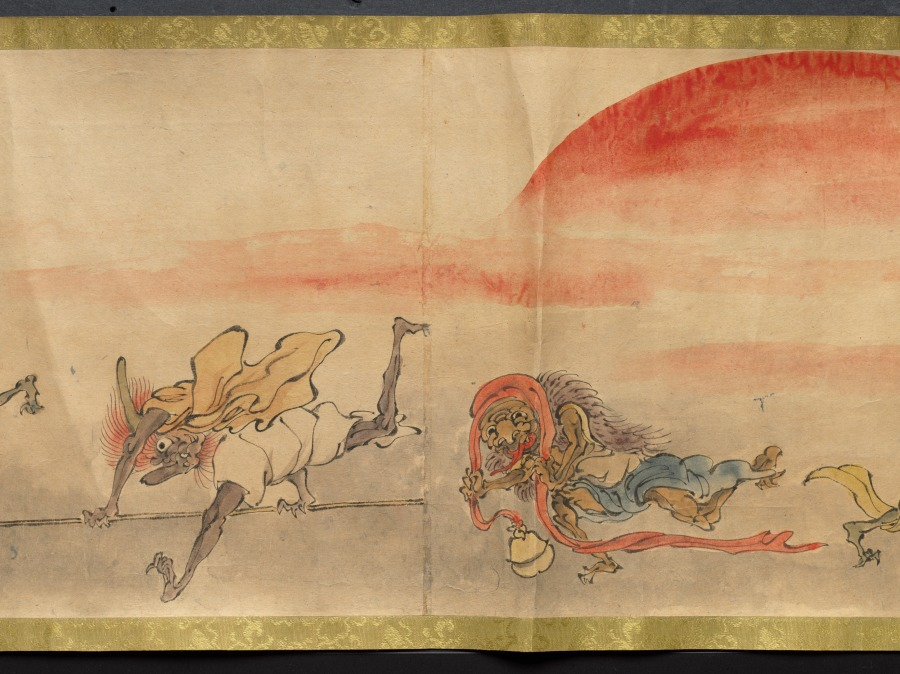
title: An Illustrated Marriage of Apparitions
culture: Japan, Edo period (1615–1868)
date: mid-1800s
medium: handscroll; ink and color on paper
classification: Painting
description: The matchmaking, engagement, wedding, and birth of the first child of two apparitions, or bakemono, literally "things that change," are illustrated in this whimsical, humorous handscroll. Japanese folklore abounds with such strange creatures, most famously represented in handscrolls featuring a procession of 100 supernatural monsters. Aside from a textual preface and cartouches indicating the content of the scenes, the tale is told visually. The artist and whereabouts of the original handscroll are unknown, but a number of other 19th-century copies by amateur painters exist in Japanese collections, attesting to its broad appeal.